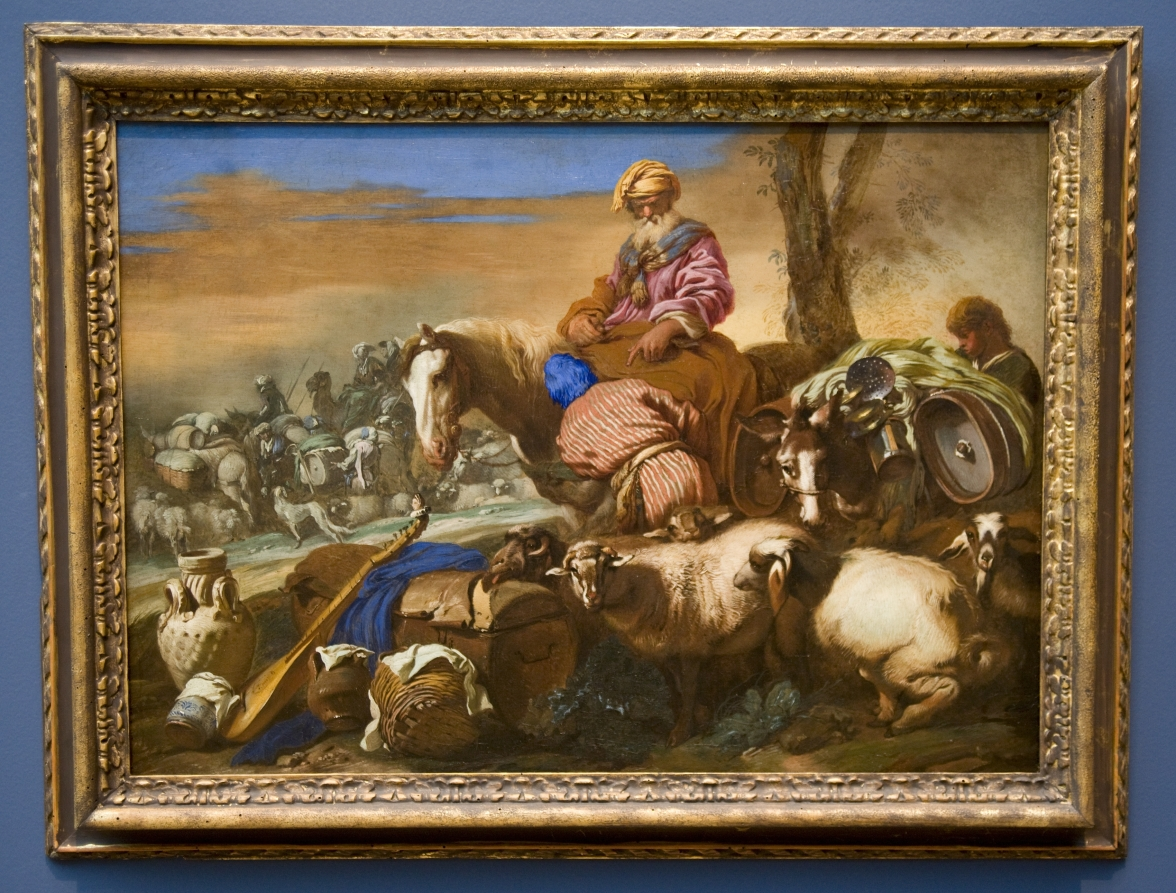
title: The Oath of Abraham’s Servant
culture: Italy, 17th century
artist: Giovanni Benedetto Castiglione (Italian, 1609–1664)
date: c. 1650–59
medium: oil on canvas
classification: Painting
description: This work has long been called Journey of a Patriarch in the belief that the artist intended no specific subject. The painting instead depicts a moment in the Old Testament book of Genesis. Abraham secures a pledge from his servant to find a wife for Abraham’s son Isaac. The servant wears a zamt, a goatskin cap common in North Africa in the 1600s, here dyed an unusual shade of blue, a color associated with faith and trust, symbolizing his sacred oath.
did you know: The musical instrument at the left symbolizes love, foreshadowing the wedding the servant pledges to facilitate.